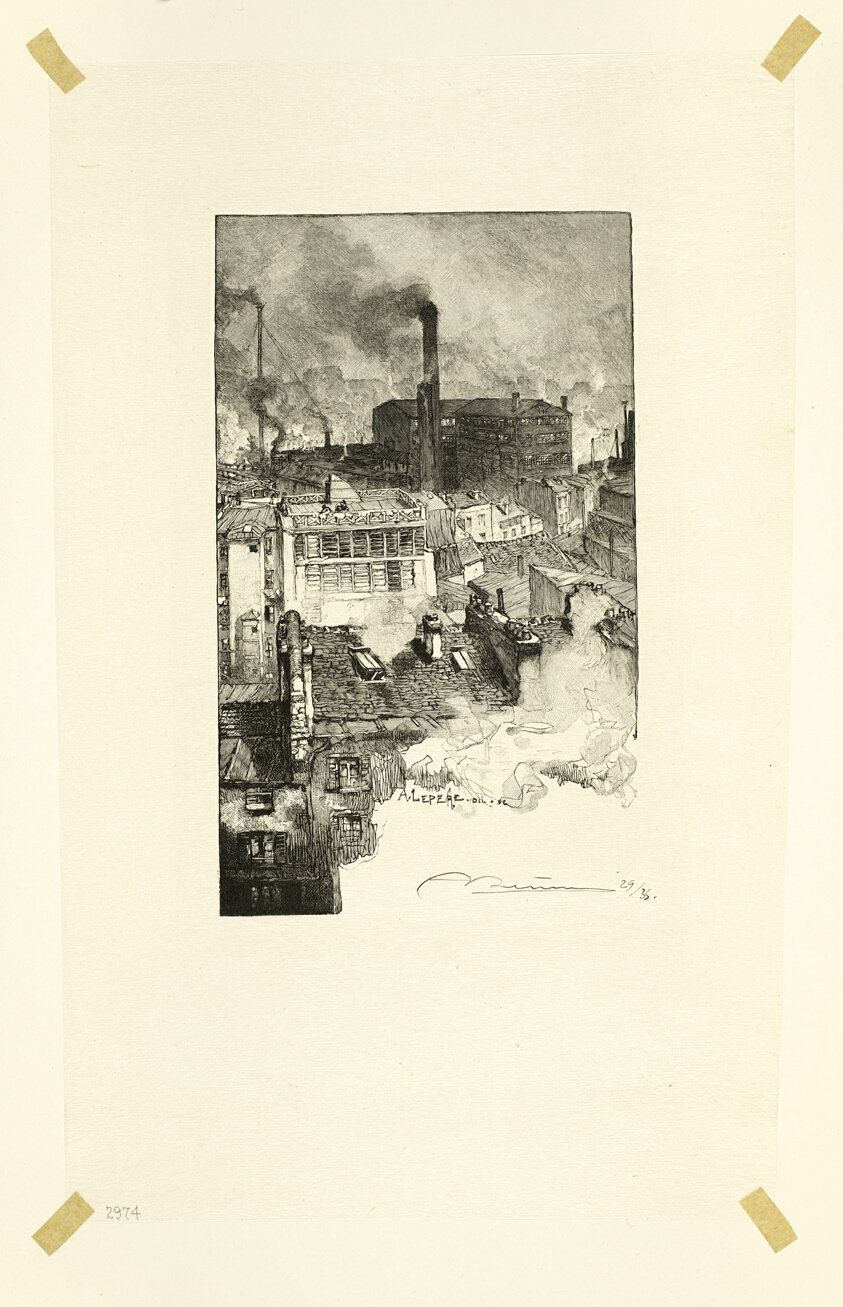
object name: Print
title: Quartier des Gobelins, plate 20 from Le Long de la Seine et des Boulevards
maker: Louis Auguste Lepère (French, 1849-1918); published by A. Desmoulins (French, active c. 1908-1910)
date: 1889, published 1910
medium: Wood engraving in black on cream Japanese tissue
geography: France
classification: wood engraving; print; prints and drawing